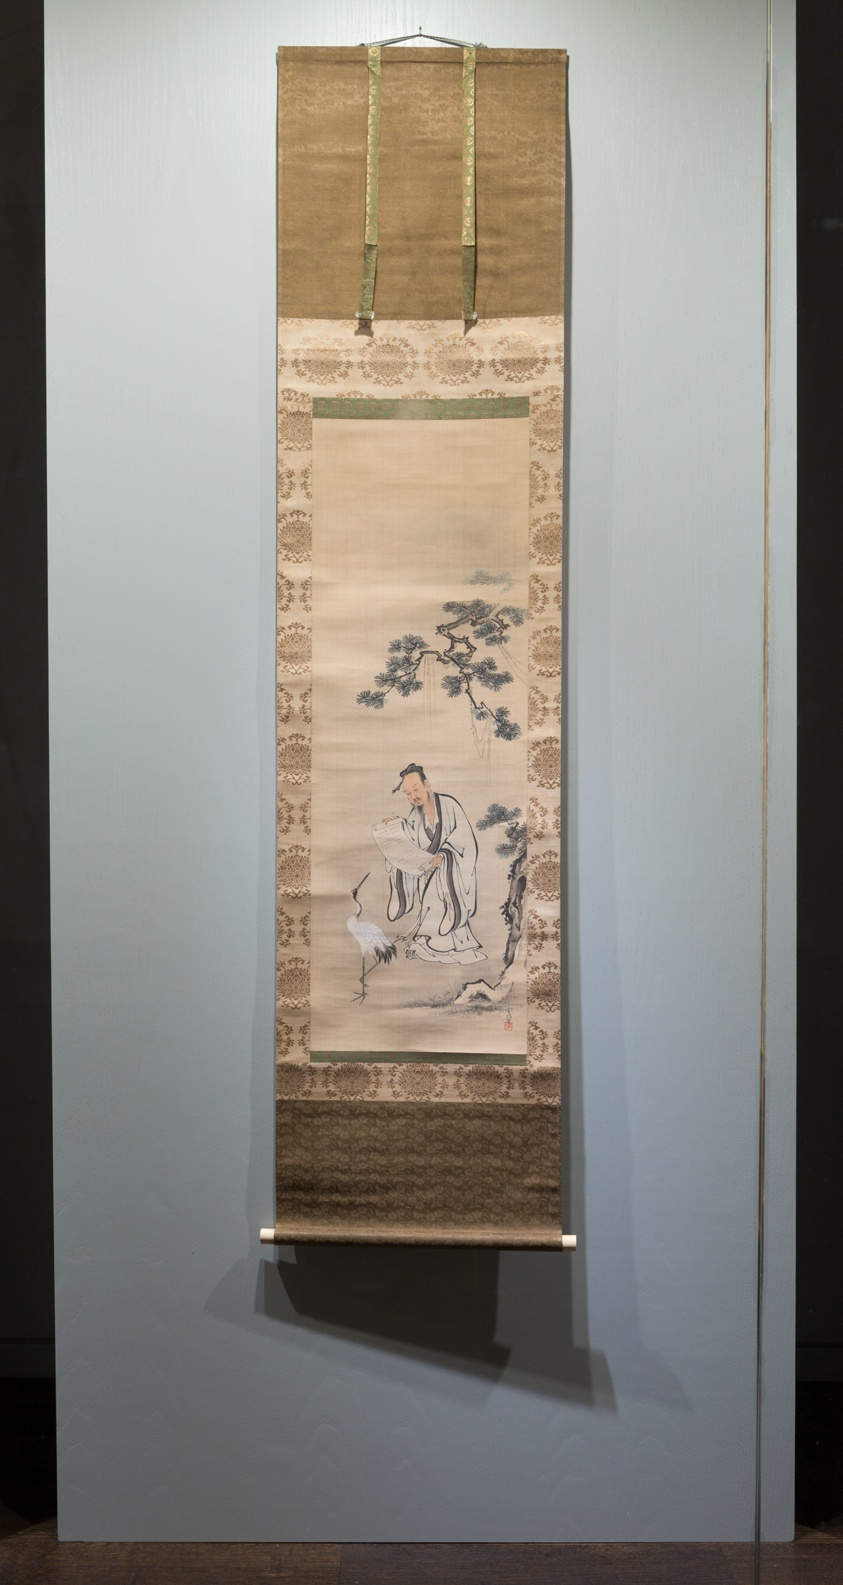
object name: Painting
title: Snowy Landscape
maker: Kano Tsunenobu; Japanese, 1636-1713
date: Late 17th–early 18th century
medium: Triptych of hanging scrolls; ink and light colors on silk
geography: Japan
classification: hanging scroll; painting; asian art